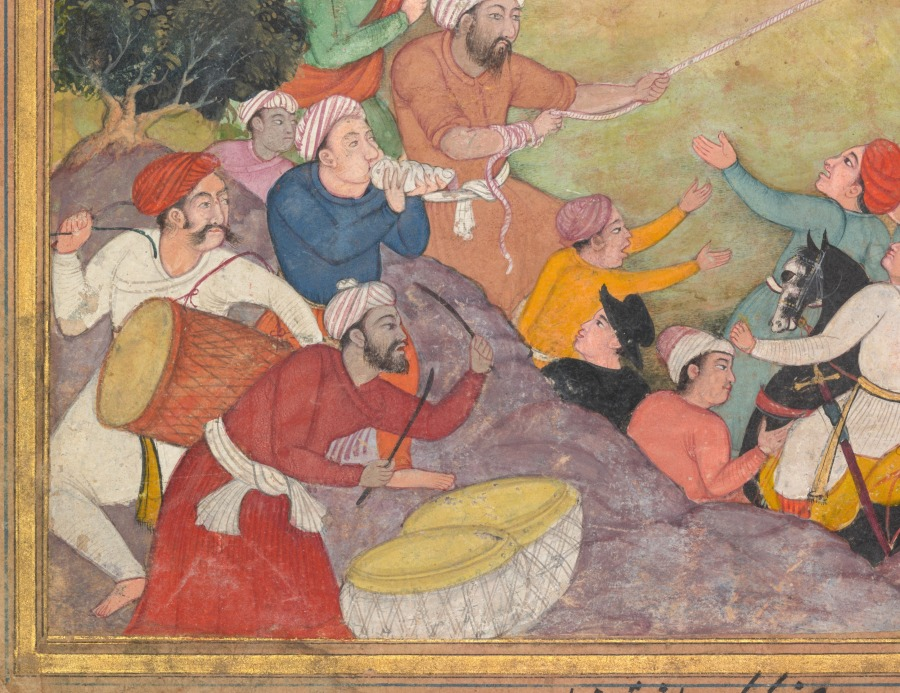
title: The game of wolf-running in Tabriz, from an Akbar-nama (Book of Akbar)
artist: Banavari 1 (Indian, active 1550s-1590s)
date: c. 1595–1600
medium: Gum tempera, ink, and gold on paper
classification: Painting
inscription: signed by Banwari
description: After four years of traveling in exile, fleeing Afghan forces, Humayun reached Tabriz, the glittering capital of the Safavid dynasty in northwestern Iran, here imaginatively rendered by the Indian artist. There the second Mughal emperor enjoyed warm hospitality extended by the shah of Iran, who called for a game of wolf-running for which the city was famous. Artists painting during the time of Akbar, late in his reign when historical subjects dominated, speculated as to how the game was played, based on eyewitness accounts. They gave the figures lively emotive expressions and gestures, and the dense crowding successfully conveys the pandemonium of the scene.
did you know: During extreme activities, turbans could come unwound and fall off.